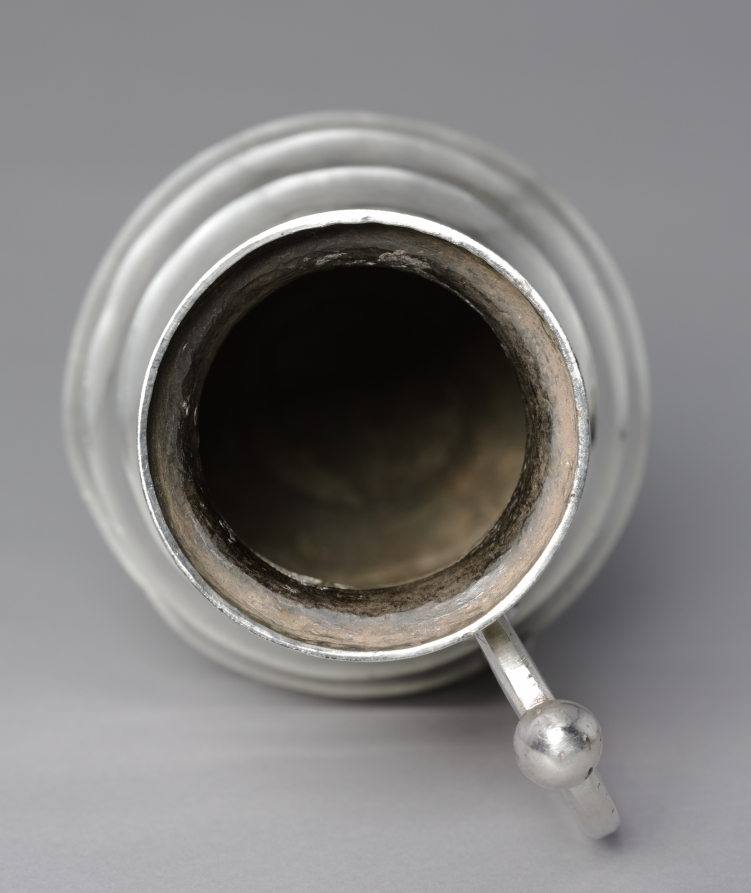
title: Stepped Pitcher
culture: Iran, Sasanian Empire (224–651 CE)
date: 400–600 CE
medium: silver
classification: Metalwork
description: The Sasanians are best known today for their expert work in silver. This museum is fortunate to have one of the most important collections of Sasanian silver vessels in the world.